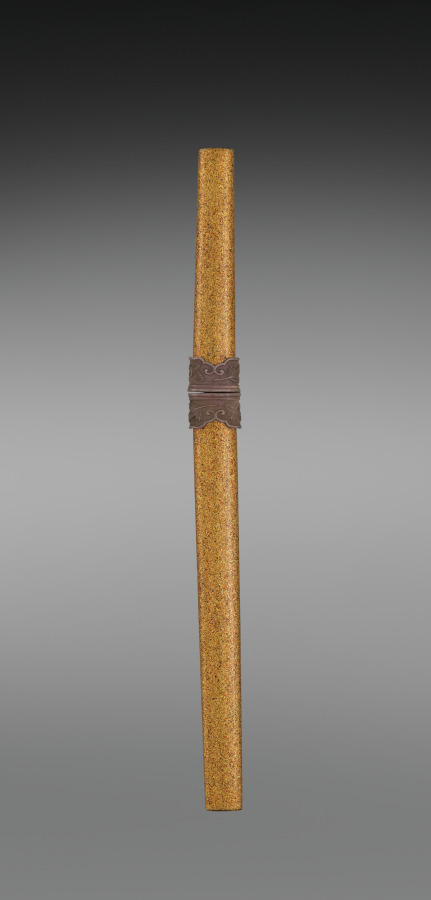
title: Writing Box (Suzuribako) with the “First Song” (Hatsune) Chapter from the Tale of Genji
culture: Japan, Meiji period (1868–1912)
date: early 1900s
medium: Lacquered wood with gold and silver sprinkled powder (maki-e), foil application (kirikane), and metal inlay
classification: Lacquer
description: The design of this box was inspired by an object in the 1639 lacquer wedding set of Chiyohime, the daughter of the shogun (ruler). Information about the set became available in the Meiji period, leading some lacquer artists to emulate its designs. This box features a scene from the chapter “First Song” (Hatsune) of the Tale of Genji, in which Prince Genji and his love Murasaki enjoy her garden. It incorporates the written characters for “first” (初, hatsu) and “sound” (音, ne), indicating the first song of the warbler in spring, associated with the new year—the water dropper for mixing the ink is in the shape of this bird.